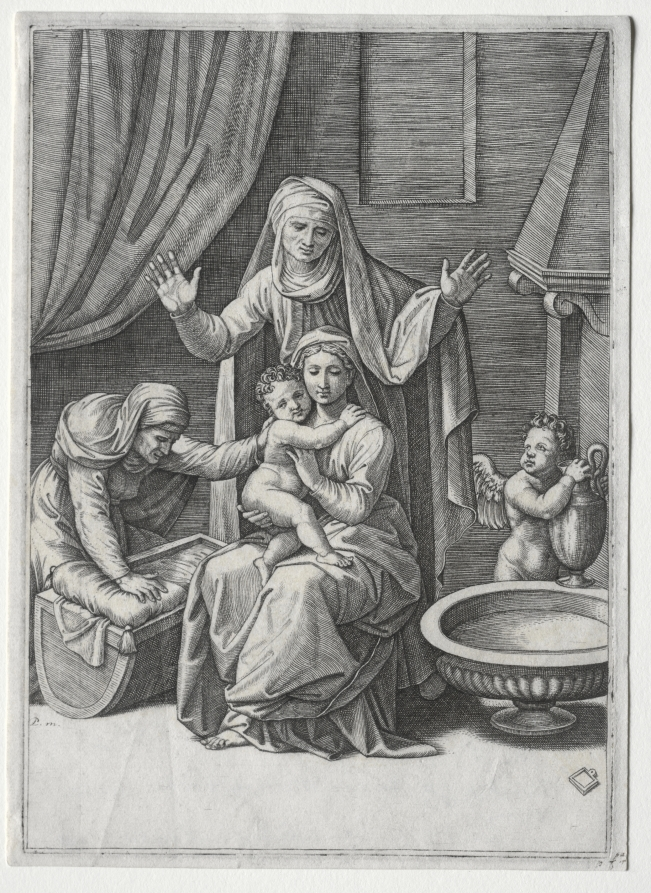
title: The Virgin and the Cradle with Saint Elisabeth and Saint Anne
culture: Italy, 16th century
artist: Marcantonio Raimondi (Italian, 1470/82–1527/34)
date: 1520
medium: engraving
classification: Print